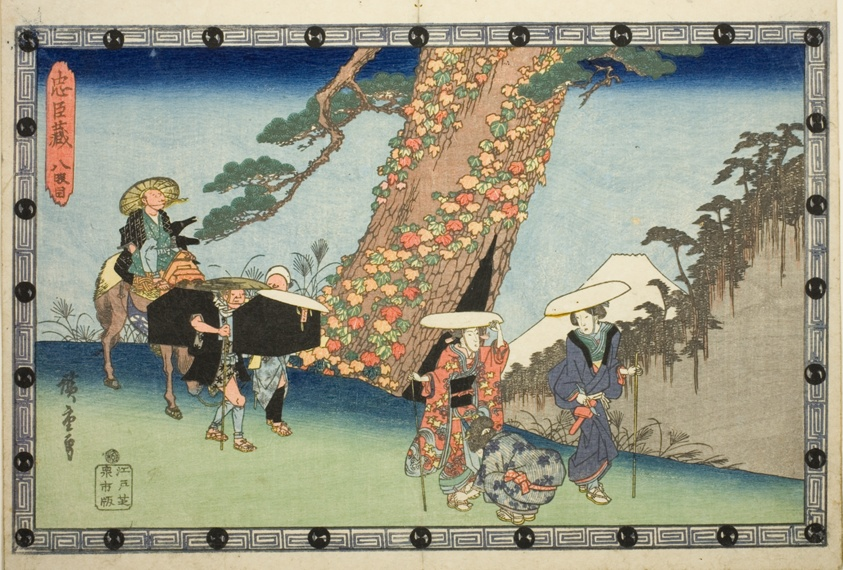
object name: Print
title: Act 8 (Hachidanme), from the series "Storehouse of Loyal Retainers (Chushingura)"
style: Japanese (culture or style)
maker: Utagawa Hiroshige 歌川 広重; Japanese, 1797-1858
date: c. 1834/39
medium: Color woodblock print; oban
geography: Japan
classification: woodblock print; print; asian art